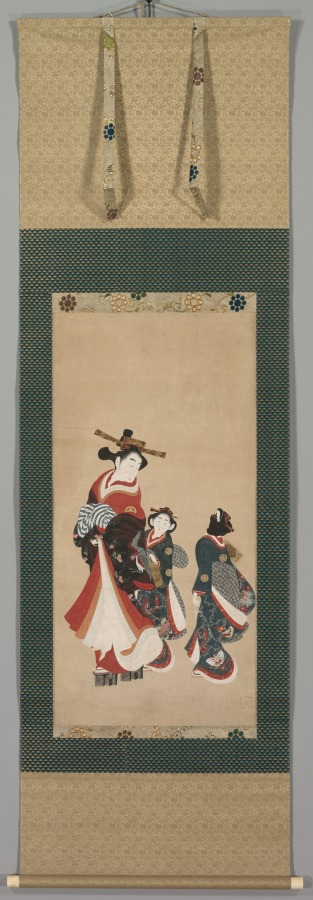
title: Courtesan and Attendants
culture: Japan, Edo period (1615–1868)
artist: attributed to Engetsudō (Japanese)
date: c. 1748–51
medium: hanging scroll; ink and color on paper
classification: Painting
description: The courtesan wears a pair of tall, lacquered wooden clogs and heavy robes, indicating it is winter. The elaborate span of her tortoiseshell comb in her fashionable coiffure enhances her glamorous appearance. Her blue-and-white striped obi is tied in a loose bow in front, typical for her profession. The round, stylized cherry blossom crest of her "house" (brothel), partially visible on her shoulder just above the shawl, also appears on the robes of her two attendants (kamuro). The attendants hold shuttlecocks, used in a game associated with New Year celebrations. One girl stares out at the viewer; the other looks back. The frontal view of the attendant’s face is somewhat rare in ukiyo-e painting and prints.